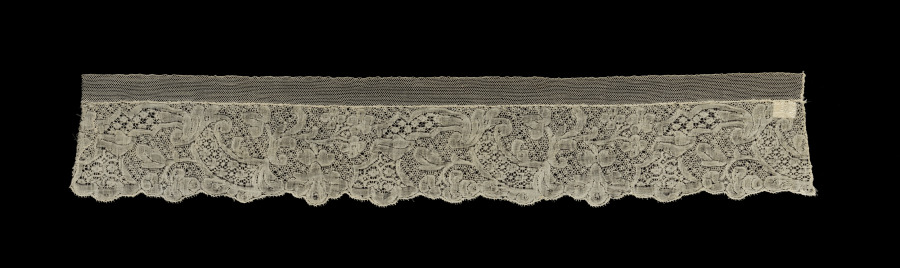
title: Lace Edging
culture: Belgium, Binche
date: 1700s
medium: Linen: bobbin lace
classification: Lace